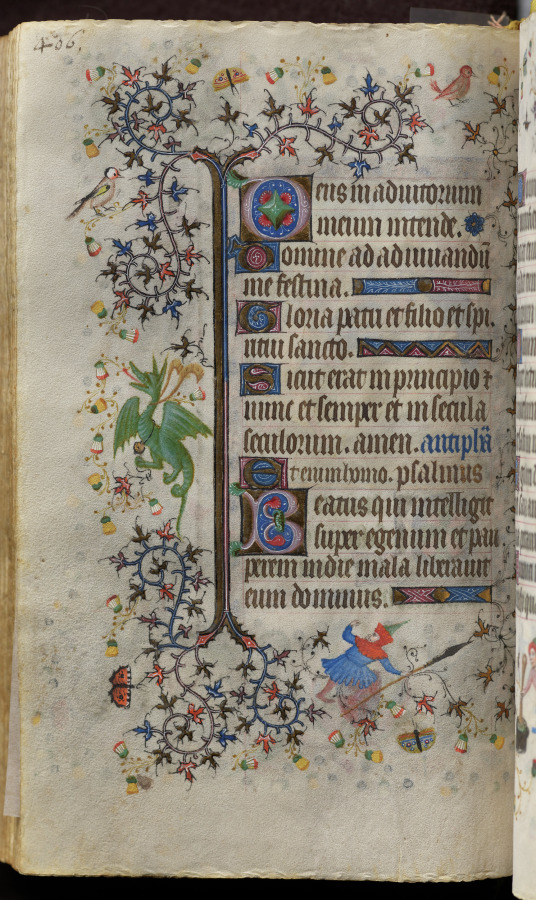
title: Hours of Charles the Noble, King of Navarre (1361-1425): fol. 197v, Text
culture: France, Paris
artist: Master of the Brussels Initials and Associates (French)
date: c. 1405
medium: ink, tempera, and gold on vellum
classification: Bound Volume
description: This precious volume was obviously highly prized by its owner, the French-born King of Navarre, who had his coat of arms painted on no less than twenty folios. Rather than directly commissioning this manuscript from a specific workshop, it seems that Charles the Noble acquired his book of hours -- perhaps ready-made for the luxury market -- while on a trip to Paris in 1404-05. A collaborative effort, six painting styles are evidenced within the pages of this codex, those of two Italians, two Frenchmen, and two Netherlanders. The painter who was responsible for the planning and decoration of the book, and who produced seventeen of the large miniatures, was a Bolognese artist known as the Master of the Brussels Initials. His principal assistant, responsible for most of the borders, was a Florentine who signed his name "Zecho" da Firenze on folio 208 verso.